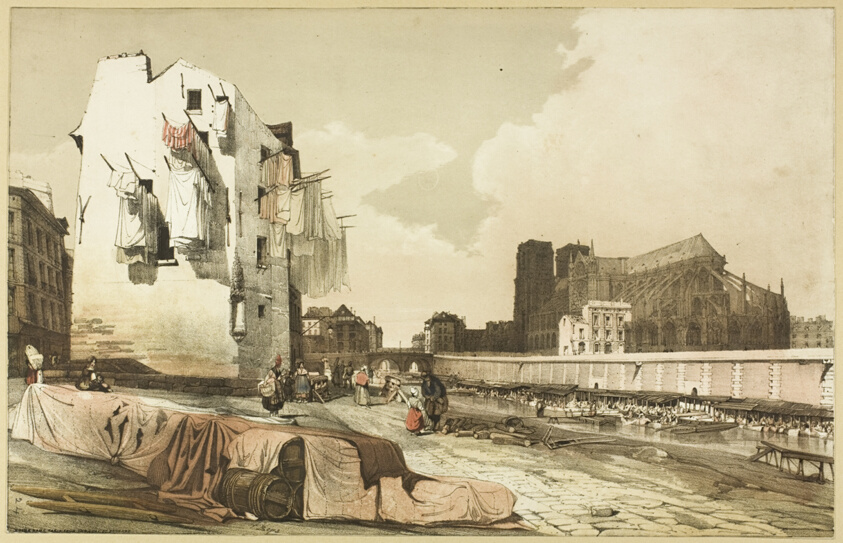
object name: Print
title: Notre Dame, Paris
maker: Thomas Shotter Boys (English, 1803-1874); published by Charles Joseph Hullmandel (English, 1789-1850)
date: 1839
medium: Color lithograph on paper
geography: England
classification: lithograph; print; prints and drawing